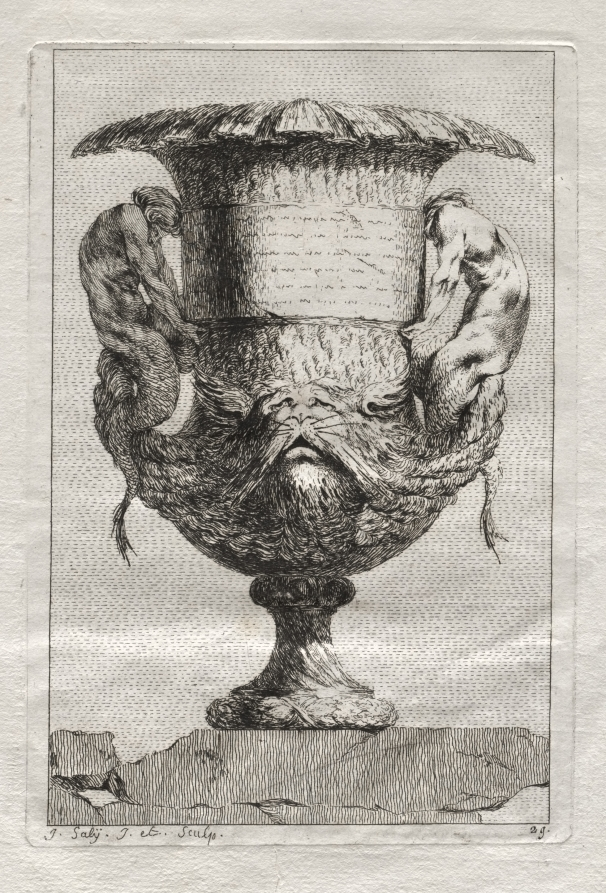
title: Suite of Vases: Plate 29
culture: France, 18th century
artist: Jacques François Saly (French, 1717–1776)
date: 1746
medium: etching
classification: Print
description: Designing ornamental vases or urns was particularly popular during the mid-18th century since the only limit to the possibilities was the imagination of the artist. Saly, a sculptor by training, was a student at the French Academy in Rome from 1740 to 1746, at which time he published a set of 30 etchings. Saly began with basic antique vase forms but deviated from classical ornament to use a rich variety of fantastic creatures for embellishment.